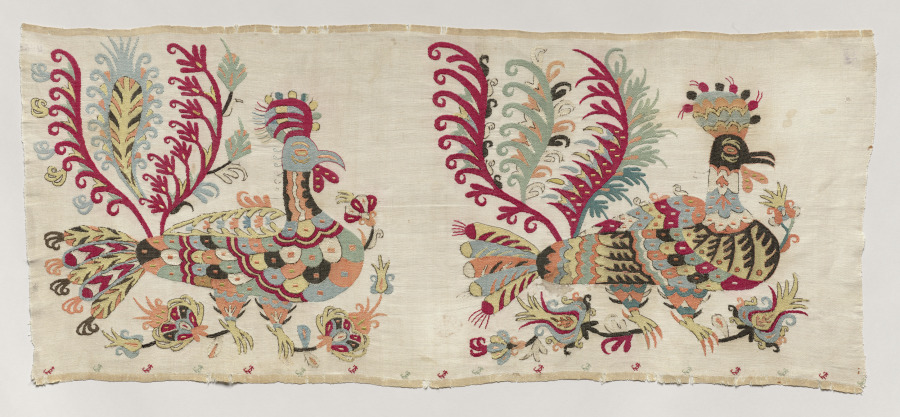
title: Panel, Probably from a Skirt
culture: Greece, Sporades Islands, Skyros, 19th century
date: 1800s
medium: embroidery: silk on linen tabby ground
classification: Embroidery